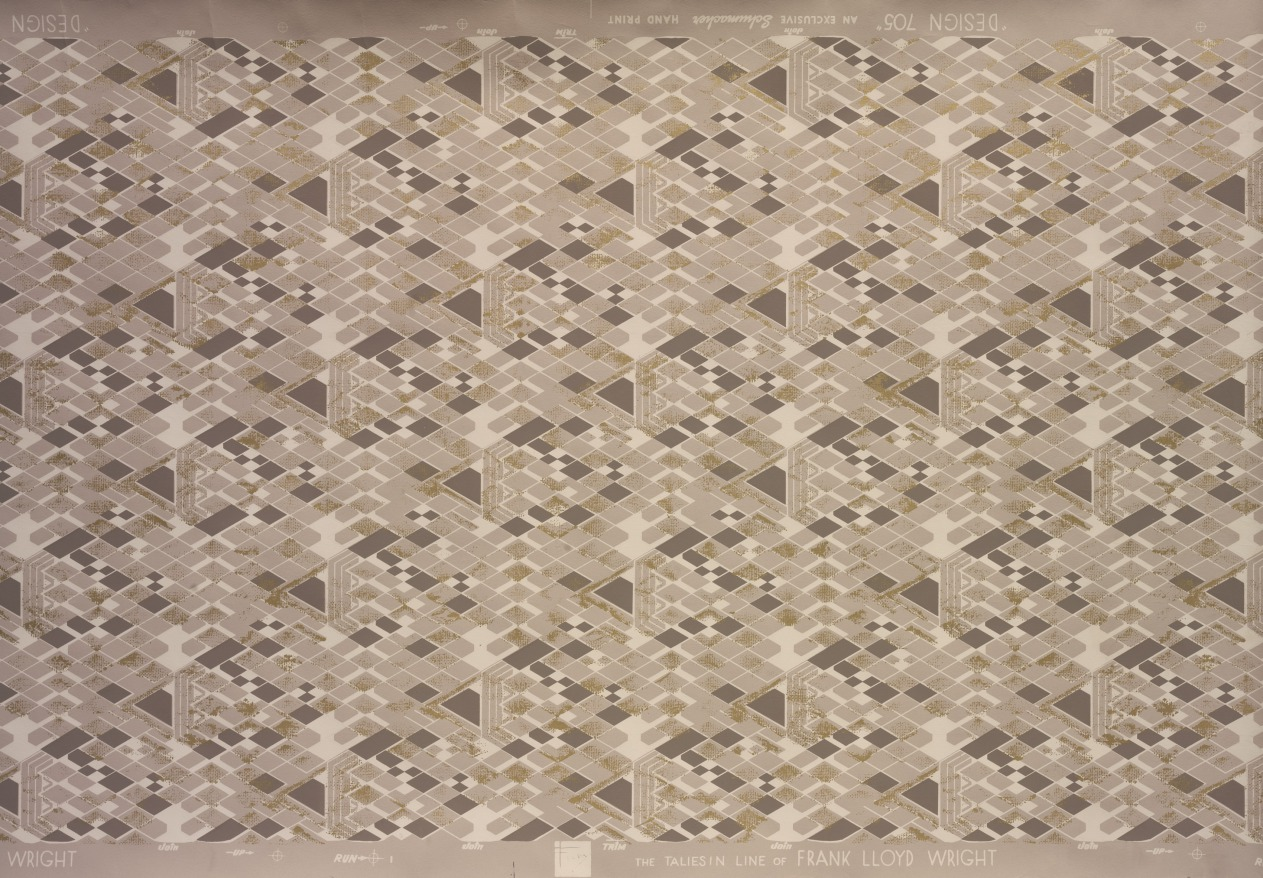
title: Design 705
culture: America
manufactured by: F. Schumacher and Co. (American)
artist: Frank Lloyd Wright (American, 1867–1959)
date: before 1959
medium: silkscreen on wallpaper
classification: Print